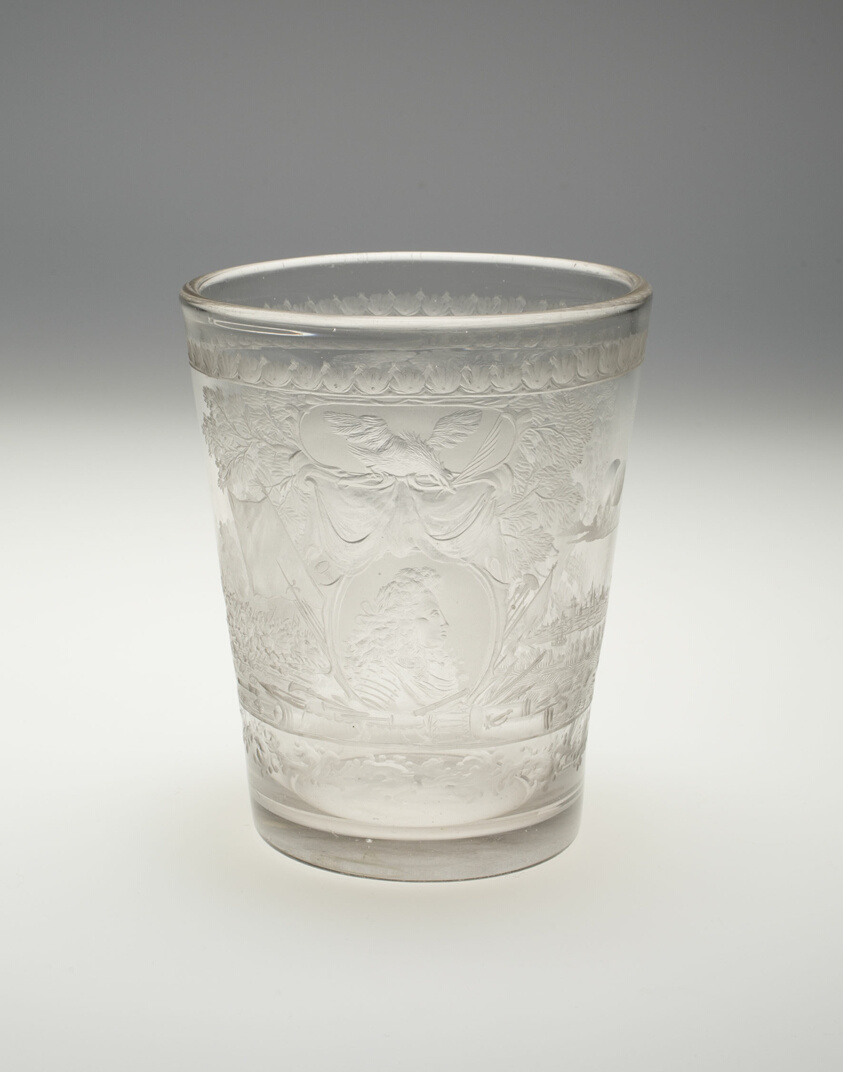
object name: Glass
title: Beaker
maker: Nuremberg, Germany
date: Early 18th century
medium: Glass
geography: Nuremberg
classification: glass; european decorative arts